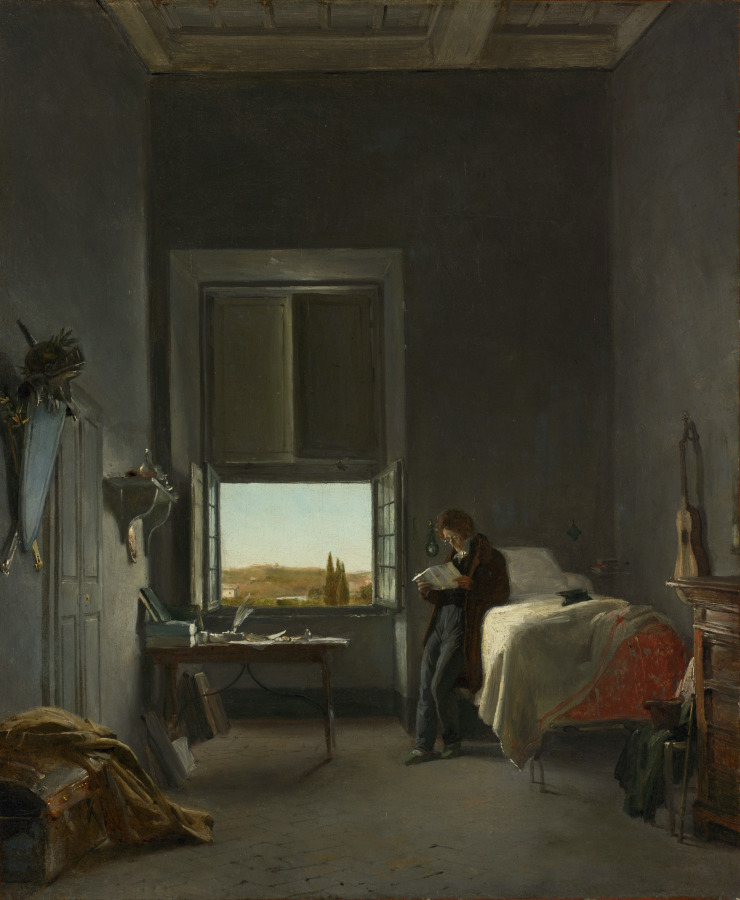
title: The Artist in His Room at the Villa Medici, Rome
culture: France, 19th century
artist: Léon Cogniet (French, 1794–1880)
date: 1817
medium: oil on canvas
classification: Painting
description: Léon Cogniet was one of many artists who traveled from across Europe to Rome during the early 19th century, drawing upon the city’s ancient past and its surrounding landscape for inspiration. In this formally composed scene, the artist stands within his studio, its walls bare and colorless in contrast to the dramatic light cast through his open window.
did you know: In 1817, Léon Cogniet won the Prix de Rome for history painting, allowing him to live and work in the city for five years. The helmet, shield, and swords seen at left refer to the expectation that Cogniet would produce a history painting each year to send back to Paris for review.